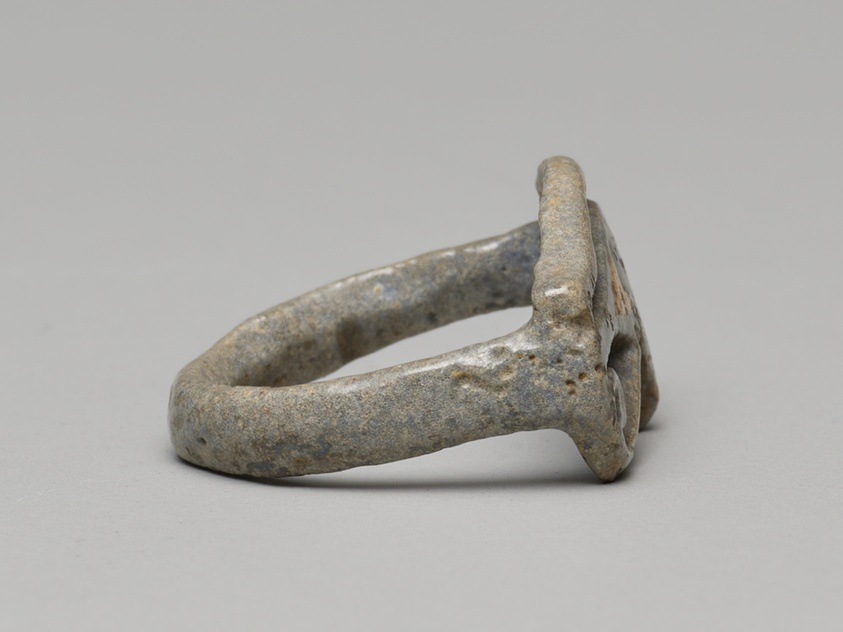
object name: Costume and Accessories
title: Eye of Horus (Wedjat) Finger Ring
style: new kingdom, egyptian, ancient, eighteenth dynasty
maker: Egyptian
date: late Dynasty 18, about 1390–1295 BCE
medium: Faience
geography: Egypt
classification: ring (jewelry); ceramics; jewelry; ancient art; costume; faïence (composite material)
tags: eye of Horus, eyes, Hieroglyphs